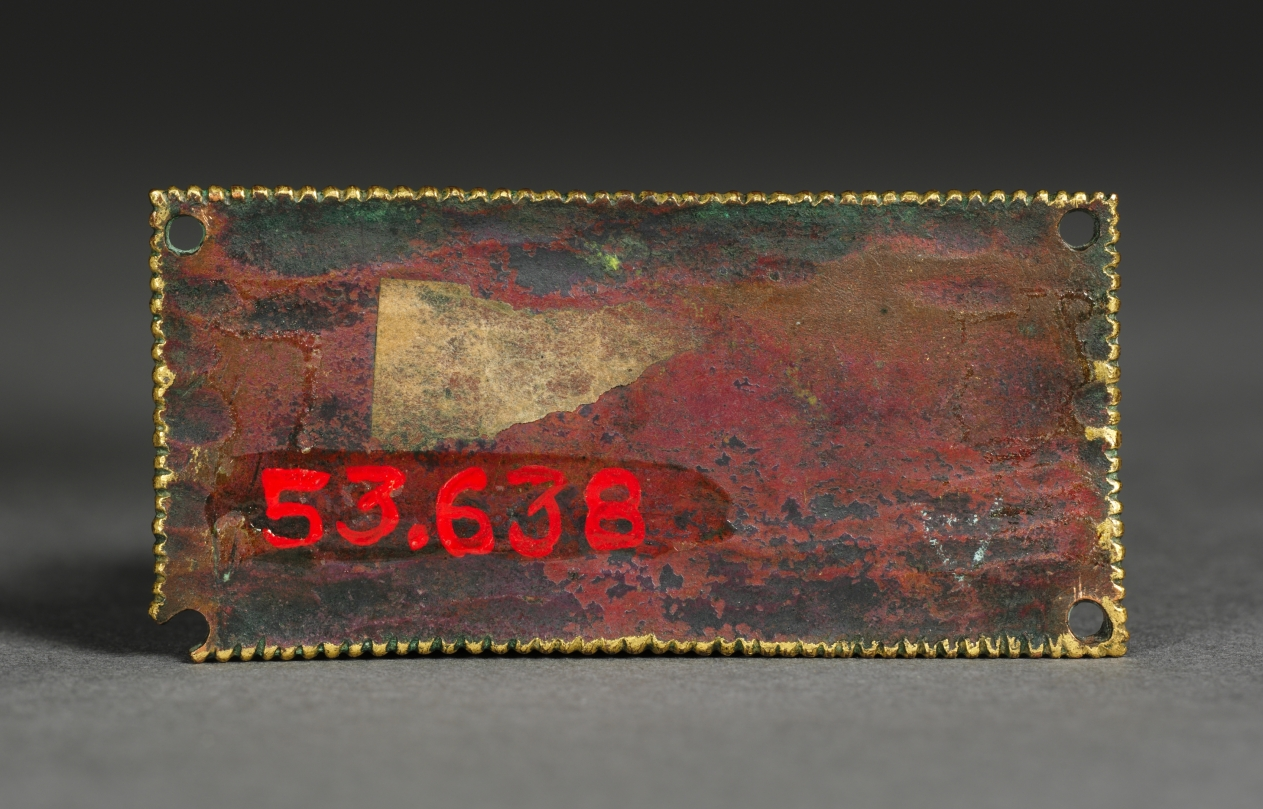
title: Plaque from a Reliquary Shrine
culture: Germany, Rhine Valley, Cologne, Romanesque period, 12th century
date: c. 1180–1190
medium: gilded copper; champlevé and cloisonné enamel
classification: Enamel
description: These decorative enamel plaques (1953.274, 1953.638, 1957.502, and 1961.27) have been linked to some of Cologne's most important reliquary shrines, namely the shrine of the Three Kings at Cologne Cathedral and the shrines of Saints Maurinus and Albinus in the Benedictine abbey church of Saint Panteleon.